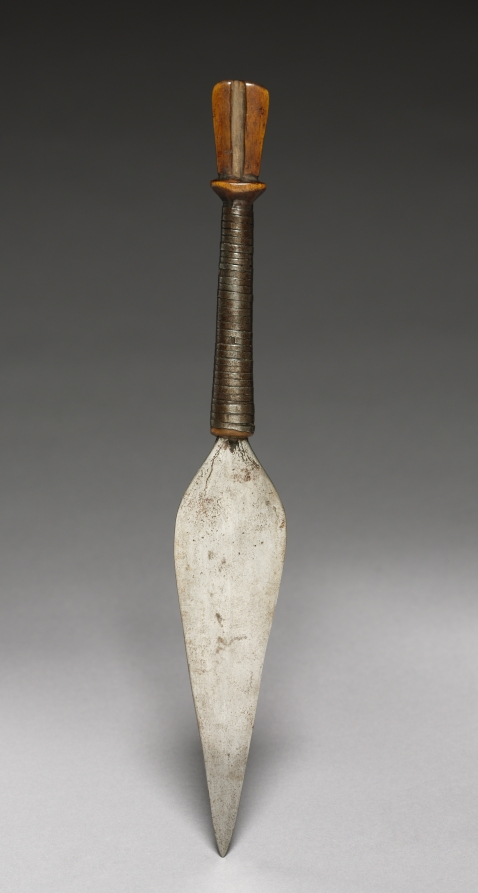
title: Dagger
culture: Central Africa, Democratic Republic of the Congo, Bakonje, 20th century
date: 1900s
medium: iron and wood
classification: Arms and Armor